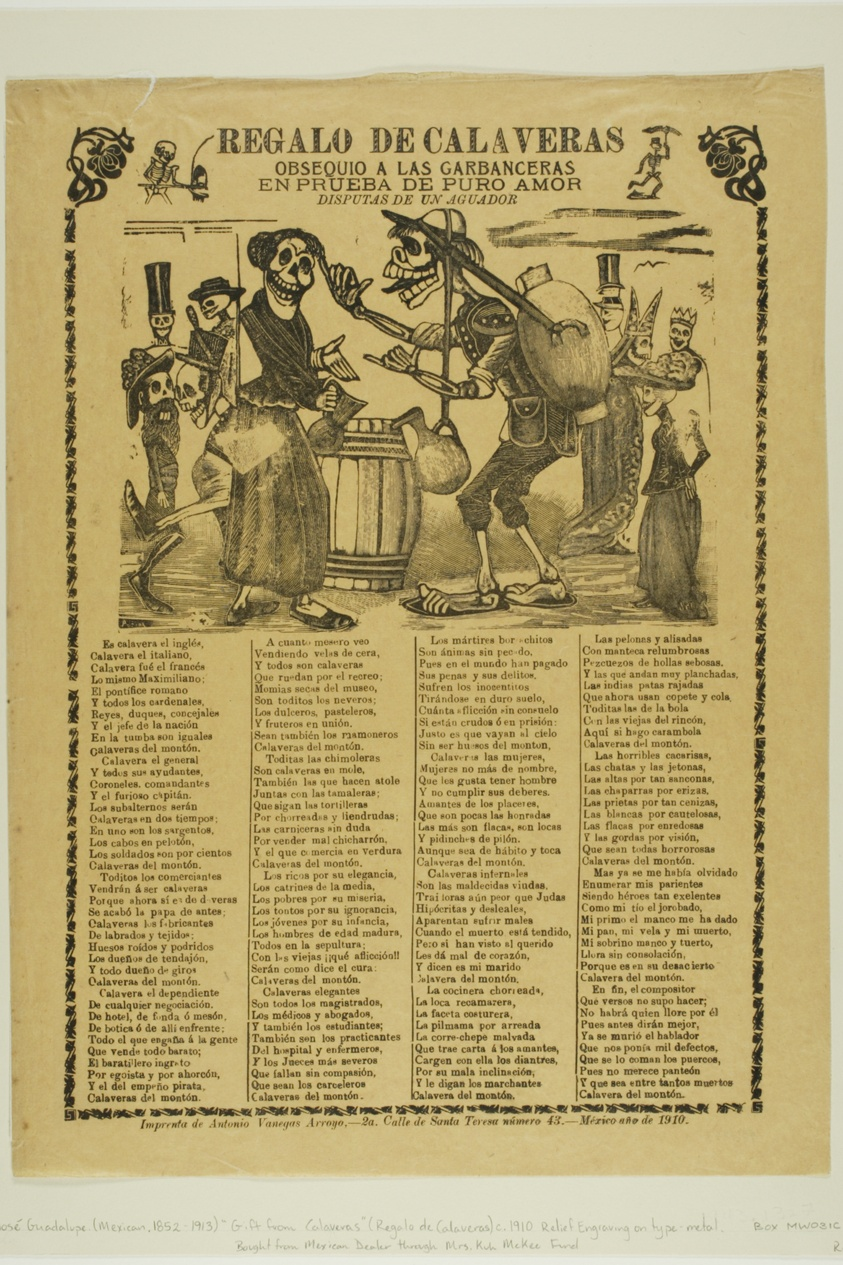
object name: Print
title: Gift from Calaveras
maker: José Guadalupe Posada (Mexican, 1852-1913)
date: 1910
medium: Relief print on paper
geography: Mexico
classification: relief etching; print; prints and drawing